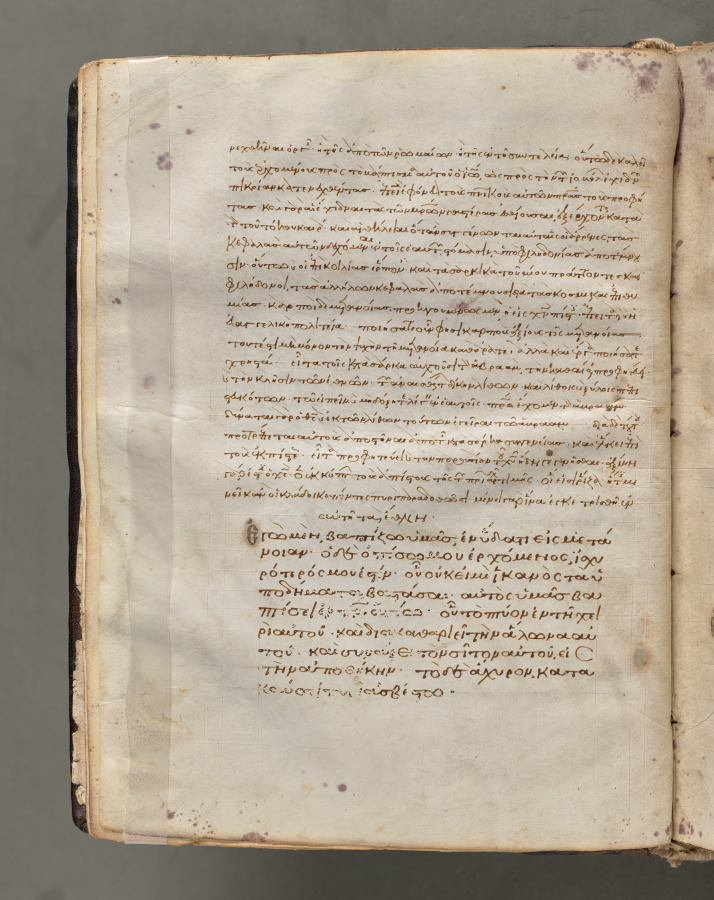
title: Text, folio 13 (verso), from a Gospel Book with Commentaries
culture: Byzantium, Constantinople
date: c. 1000–1100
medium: ink, tempera, and gold on vellum; leather binding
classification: Bound Volume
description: Each of the four gospels in this book opens on a page with brilliantly illuminated borders depicting the author of the text as well as birds-principally peacocks, symbols of the immortality of the soul-and fountains, representing the fountain of life and the salvation of the soul. This volume consists of 428 leaves with texts in Greek. Its level of sophistication suggests that it was probably written and decorated in a monastery in Constantinople.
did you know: Gospel Books were carried in procession through Byzantine churches.